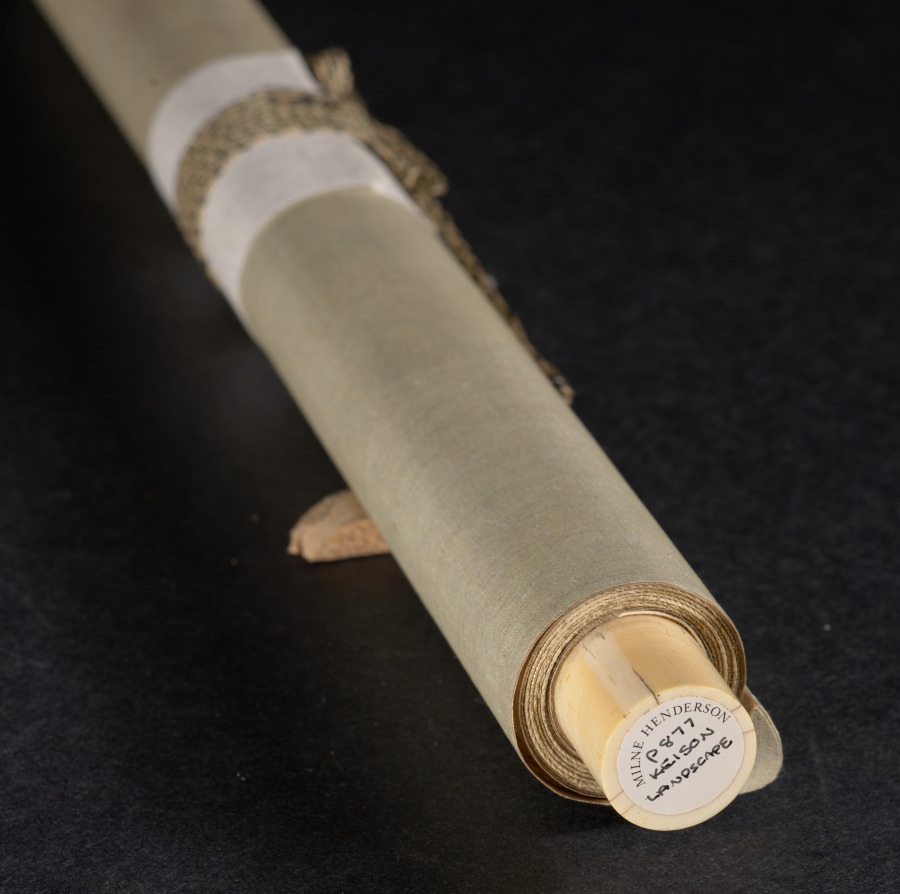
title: Coastal Landscape in the Haboku Style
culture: Japan, Muromachi period (1392–1573)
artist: Keison (Japanese, active late 15th to early 16th century)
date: late 1400s–early 1500s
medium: hanging scroll, ink on paper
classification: Painting